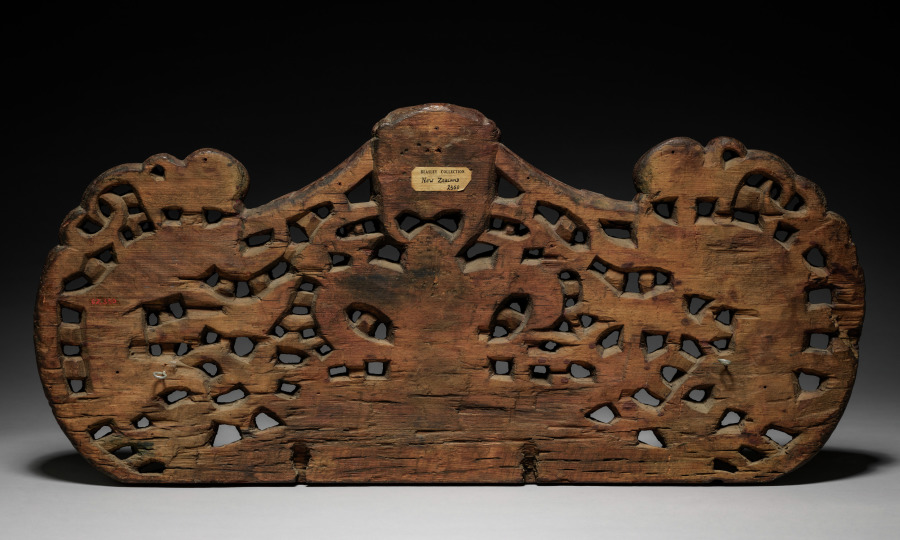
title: Door Lintel (Pare)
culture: Pacific Islands, Polynesia, New Zealand, Māori people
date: 1800s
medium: wood, pigment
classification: Sculpture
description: In the past, a lintel (pare) was placed over the entryway of Māori meeting houses, which are sacred structures. Thus, the visitor passed under the lintel’s central deity figure, often a female but here of unclear sex. To either side is an animal-like guardian spirit (manaia) shown in profile and facing outward; look for the feet grasping the lintel’s borders.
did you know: Two guardian spirits (manaia) flank the central deity figure of this lintel (pare).